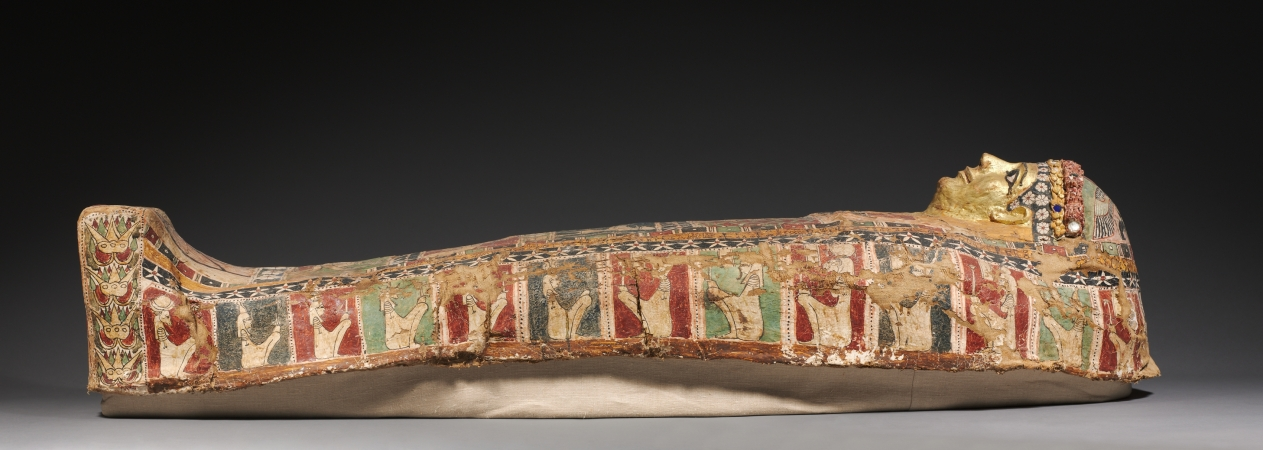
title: Cartonnage Mummy Case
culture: Egypt, Greco-Roman period (332 BCE–395 CE), Ptolemaic dynasty (305–30 BCE)–Roman empire (30 BCE–395 CE)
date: c. 50 BCE–50 CE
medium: cartonnage, painted and gilded, with glass inlays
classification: Funerary Equipment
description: This mummy case is made of cartonnage, a material similar to papier-mâché, but using layers of linen rather than paper. Cartonnage mummy cases such as these are contemporary with funerary portraits painted on wood or linen, although they present a very different appearance. The face, modeled in plaster, is bland and idealized, although the effect of the gilding and glass inlays is quite dazzling. The body is painted with traditional, age-old funerary motifs: the god Osiris, seated and mummiform; the fetish of Abydos, holy city of Osiris, flanked by standing deities (Thoth and Shu); a Horus falcon with outspread wings, and the bark of Sokar. Below these are the sandaled feet of the deceased. On the sides are rows of seated deities. On the top of the head are a winged scarab beetle flanked by Anubis jackals. On the foot are painted the soles of the deceased’s sandals, flanked by scorpions for protection.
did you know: This coffin is smaller and later in date than the other coffins in this gallery. It is made of cartonnage, which used layers of linen to create a material similar to papier-mâché. The painted portrait head displays the influence of Roman portraiture at this time and incorporates both gilding and glass inlays. Despite the fragile materials, this mummy case survived due to the very dry desert climate in which it was found.